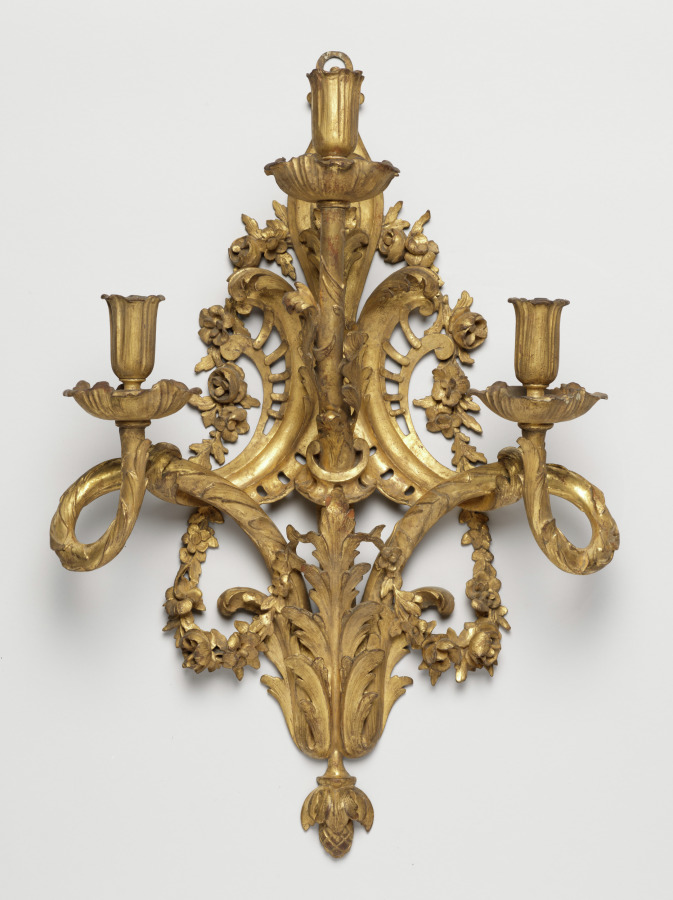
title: Candle Bracket (2 of 2)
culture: France, Transitional Style, Louis XV to Louis XVI, 18th century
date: c. 1765–1775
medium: gilded wood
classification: Furniture and woodwork